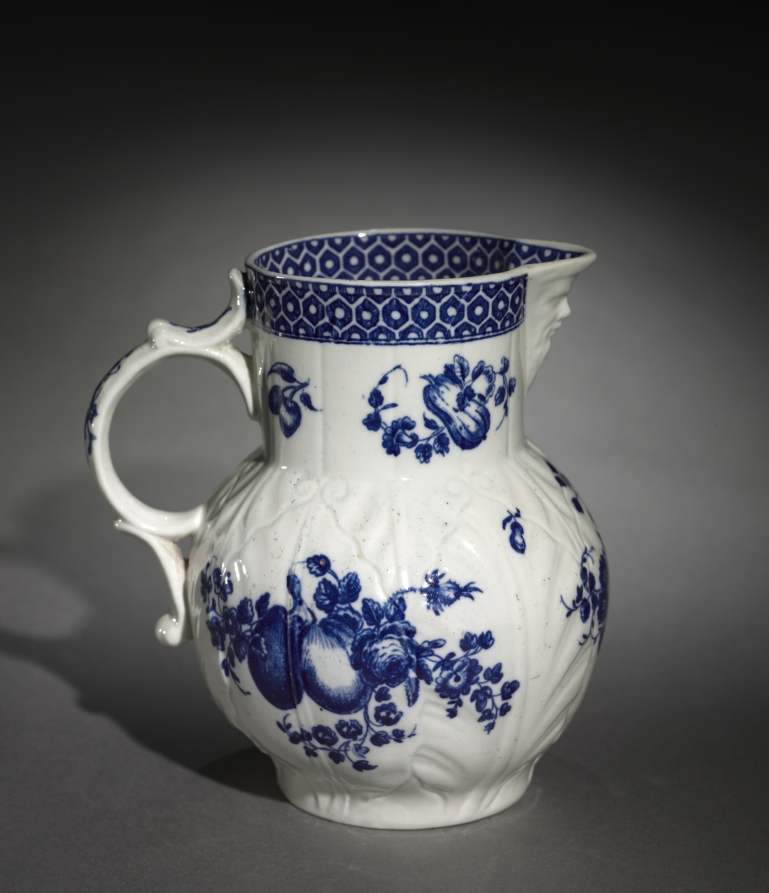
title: Pitcher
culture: England, 18th century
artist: Worcester Porcelain Factory (British, established 1751)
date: c. 1750–70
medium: porcelain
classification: Ceramic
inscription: Half moon mark on the bottom.